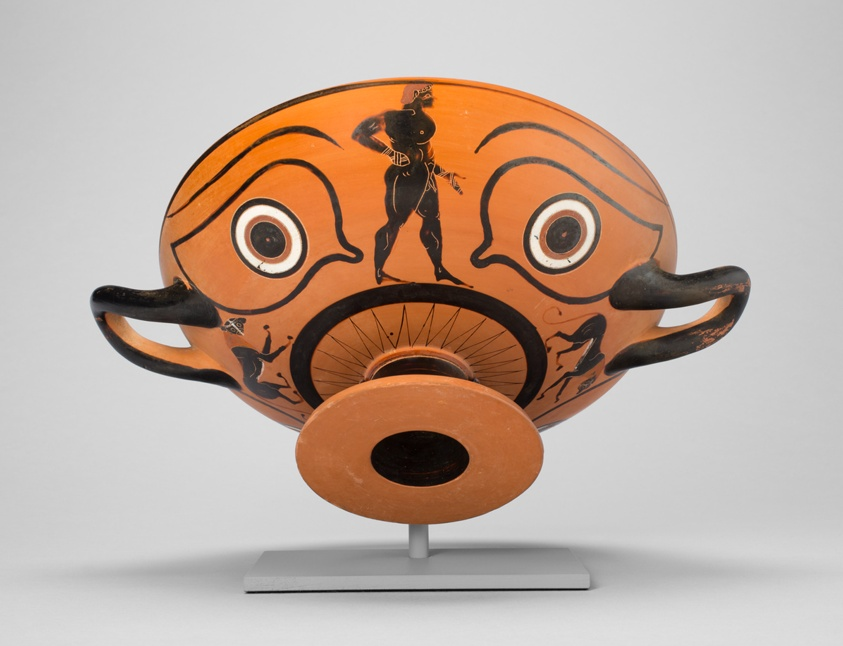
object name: Vessel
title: Kylix (Drinking Cup)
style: archaic (greek), black-figure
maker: Attributed to the Workshop of Nikosthenes; Greek; Athens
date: 530-520 BCE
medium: terracotta, black-figure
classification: drinking vessel; vessel